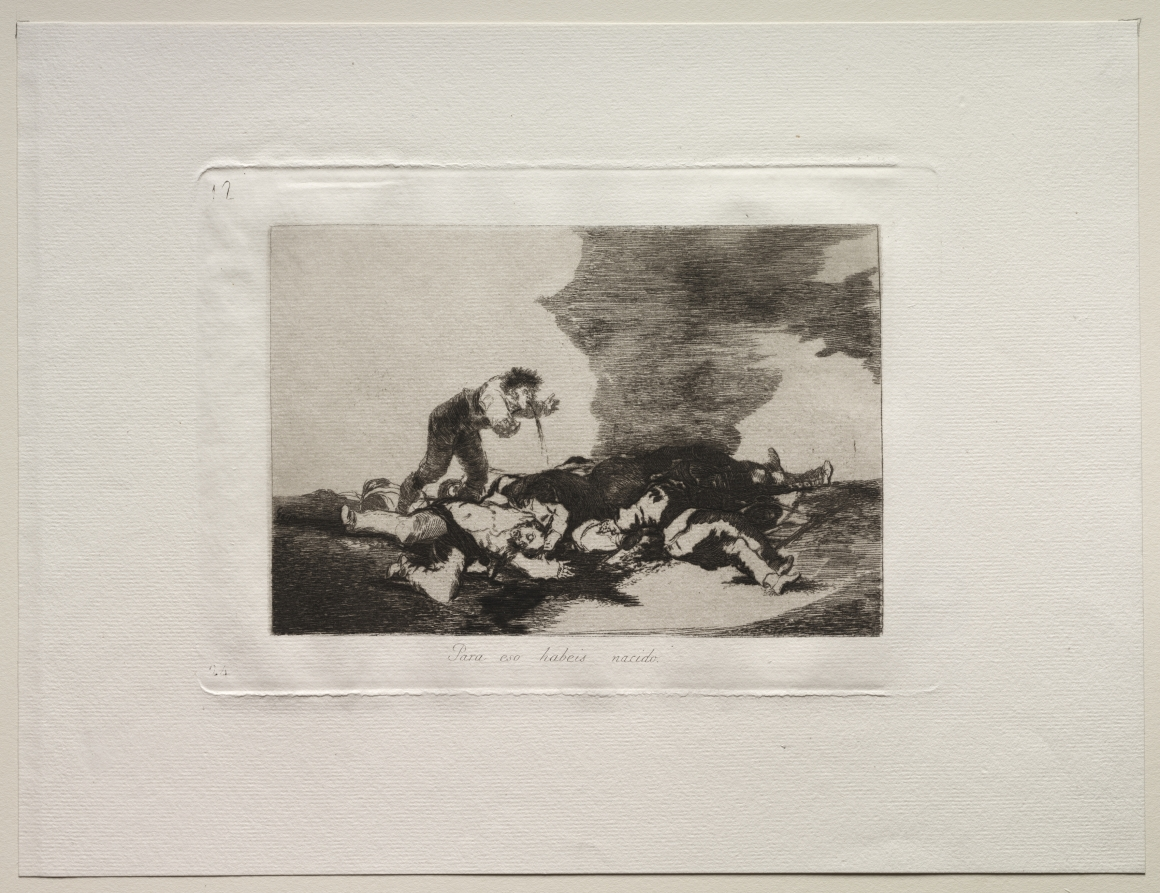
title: The Horrors of War: This is What You Were Born For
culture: Spain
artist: Francisco de Goya (Spanish, 1746–1828)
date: c. 1810–20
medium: etching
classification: Print